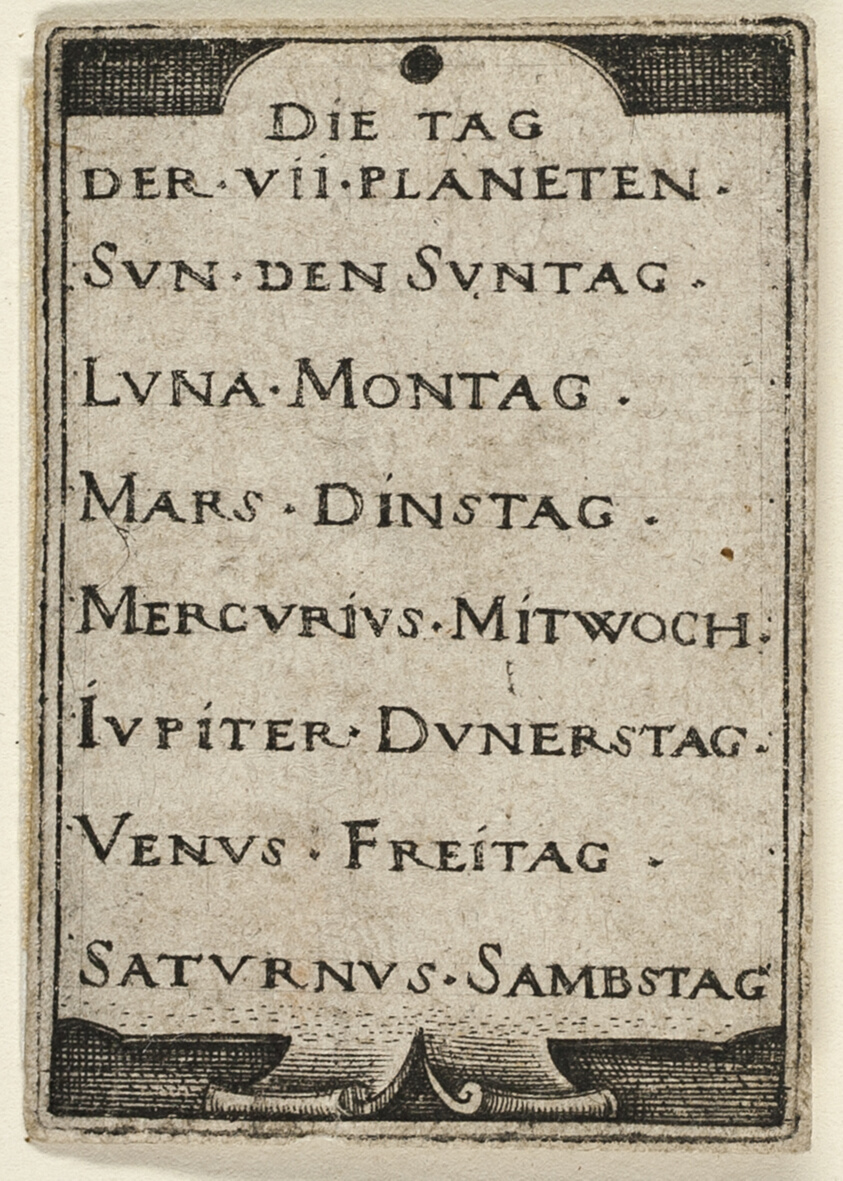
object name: Print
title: Title Page, from The Seven Planets with the Zodiacs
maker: Sebald Beham; German, 1500-1550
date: 1539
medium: Engraving in black on ivory laid paper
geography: Germany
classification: engraving; print; prints and drawing